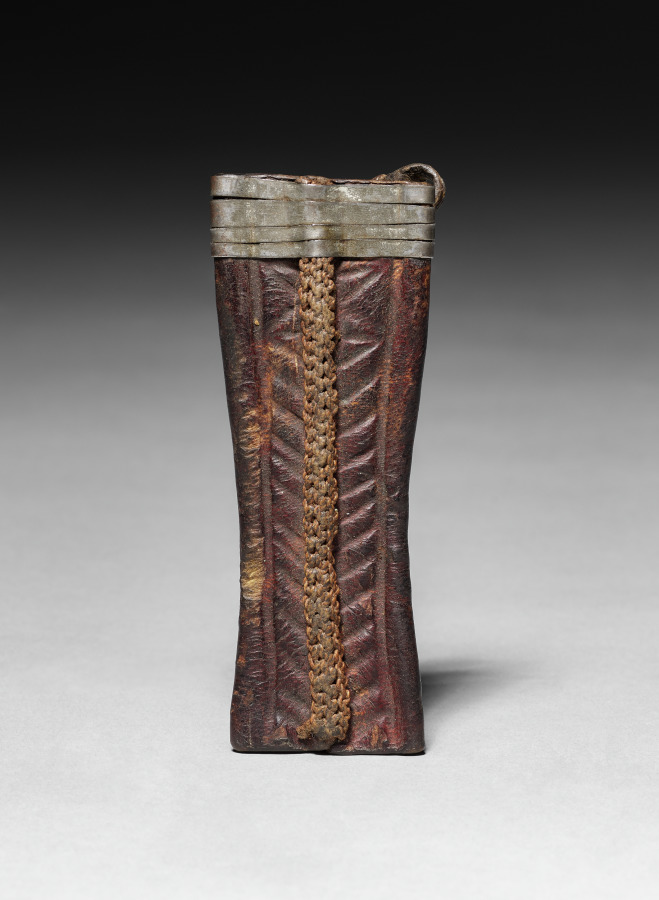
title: Sheath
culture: Central Africa, Democratic Republic of the Congo, Mangbetu, 20th century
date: 1900s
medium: Leather and tin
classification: Arms and Armor